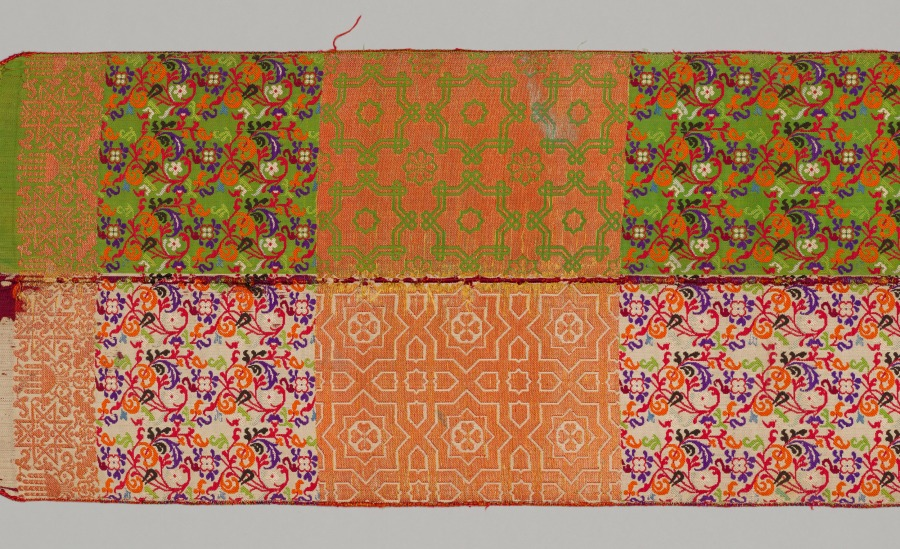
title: Belt (Hizam)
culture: Africa, North Africa, Morocco, Fes, Moroccan weaver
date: 1800s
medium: Silk, dye, metal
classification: Textile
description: Elaborate wedding sashes woven in Fez, Morocco, are distinctive for their multiple colors, designs, and uses. Folded lengthwise, they are wrapped around the waist so that the colors and designs coordinate with the attire worn during and after a wedding. Typically, the colors vary on each half although the designs are the same. Luxury textiles with elaborate patterns were woven on large looms called drawlooms that automatically repeated designs. The weaver operated the structure, inserting horizontal wefts, while the drawboy activated the programmed pattern. However, this wedding sash has ten programmed designs, which required considerable expertise.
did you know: Women sometimes added starch to stiffen these belts.